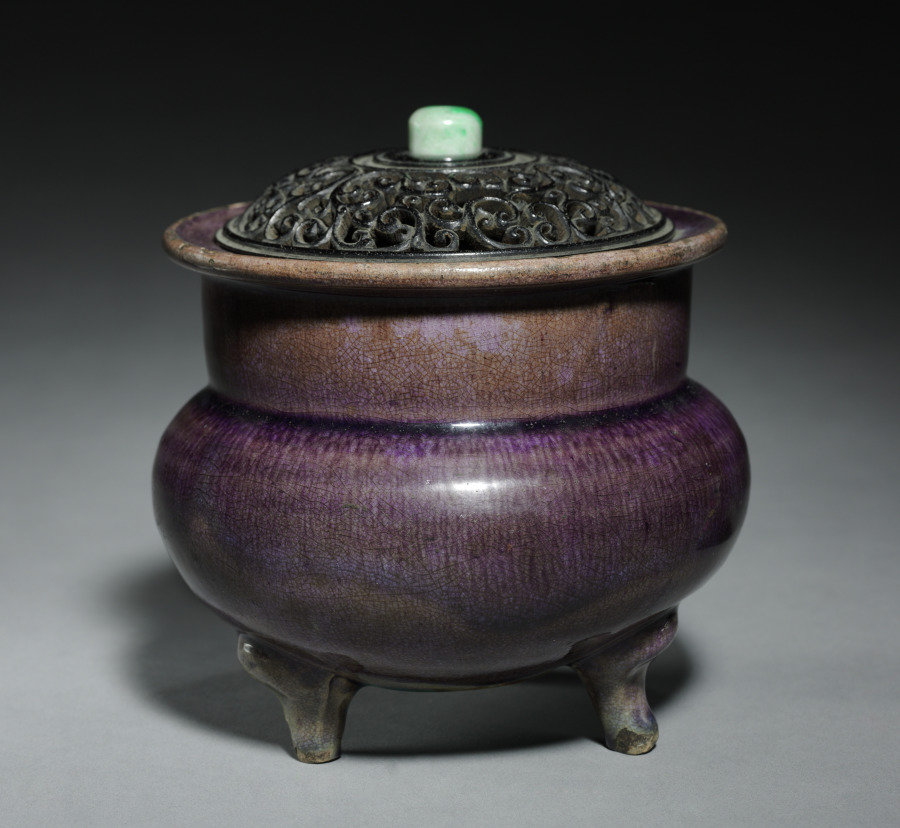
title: Tripod: Ding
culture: China, Ming dynasty (1368–1644)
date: 1368–1644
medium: porcelain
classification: Ceramic